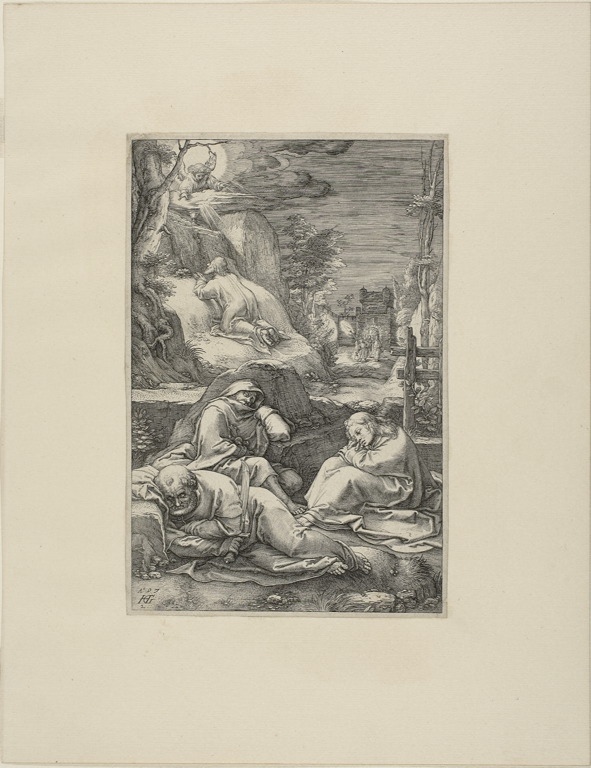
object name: Print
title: The Agony in the Garden, plate two from The Passion of Christ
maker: Hendrick Goltzius (Dutch, 1558-1617)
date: 1597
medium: Engraving in black on cream laid paper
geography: Netherlands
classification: engraving; print; prints and drawing